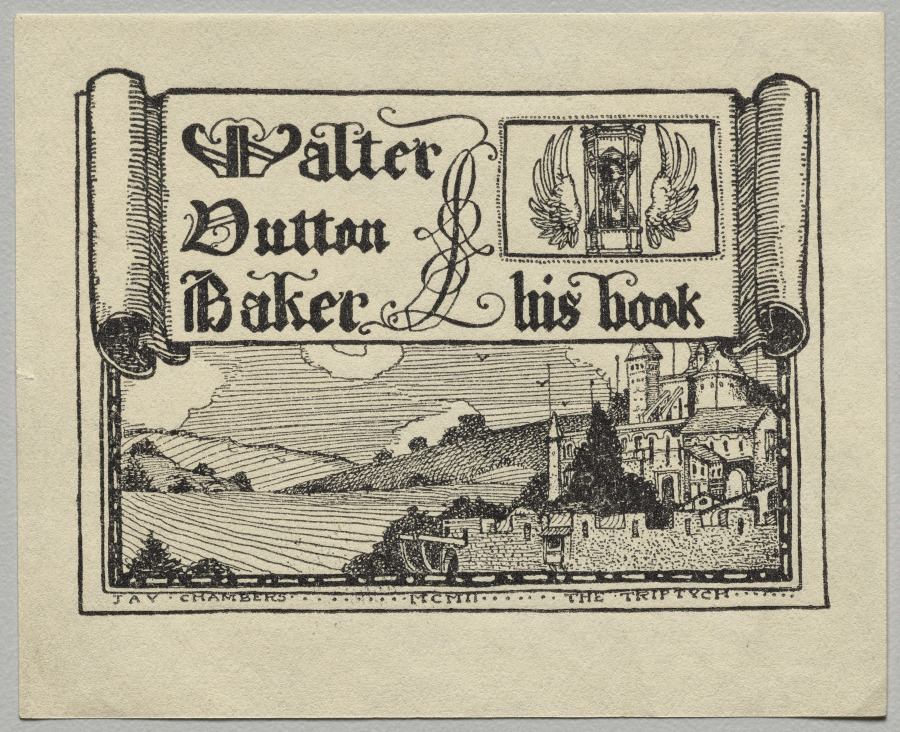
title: Bookplate: Walter Dutton Baker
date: 1902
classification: Print